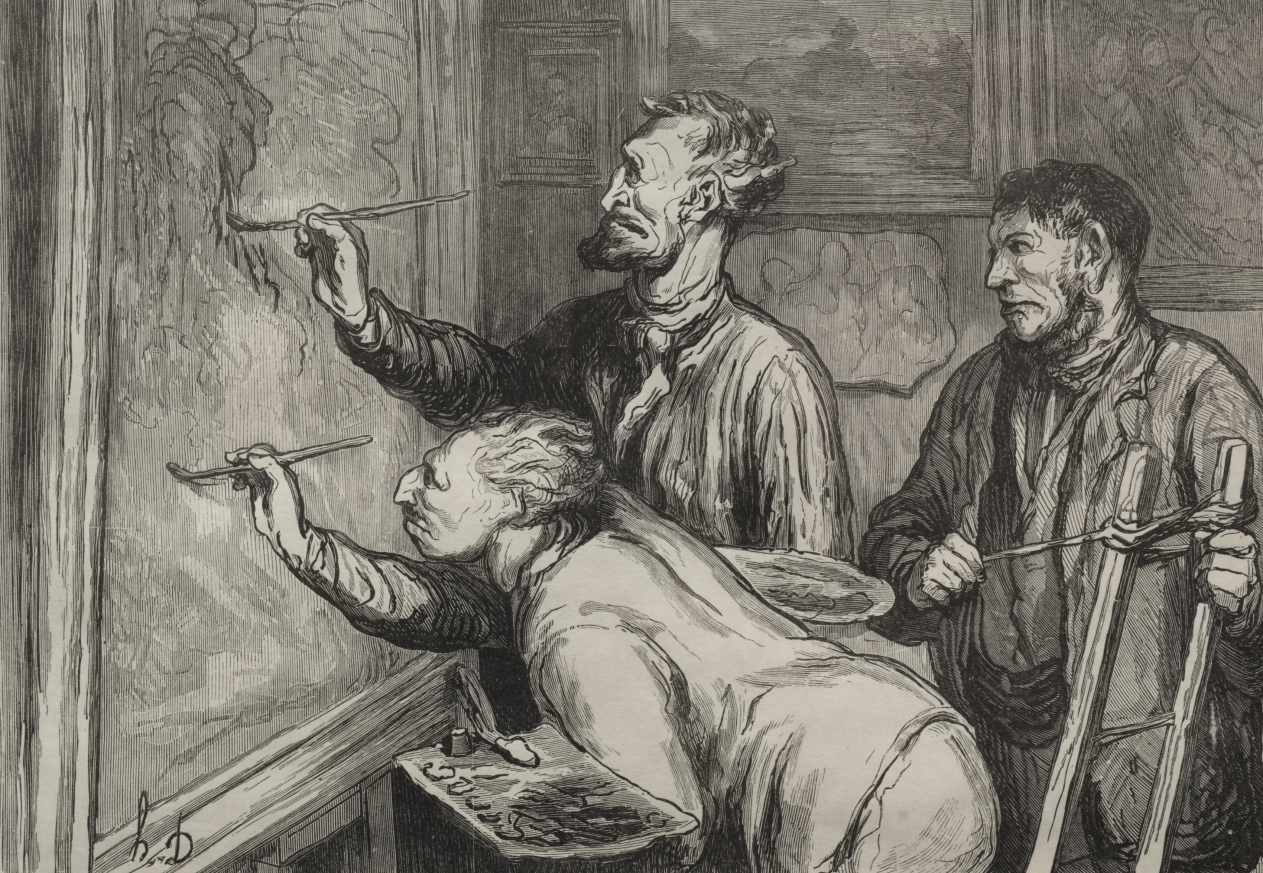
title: The Paintings Exhibition of 1868: Giving it the last touch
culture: France, 19th century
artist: Honoré Daumier (French, 1808–1879)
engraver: Étienne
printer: François Louis Schmied (Swiss, 1873–1941)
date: 1868, printed 1920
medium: wood engraving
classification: Print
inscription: Lower margin, in pencil: 40/75 ; red stamp: FLS